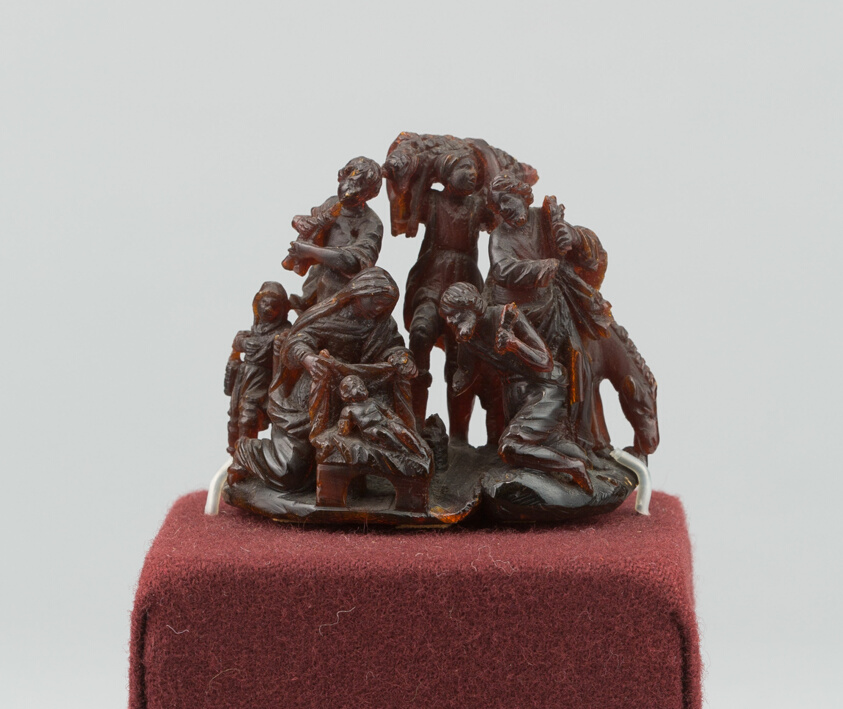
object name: Sculpture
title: Adoration of the Christ Child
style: sixteenth century, 16th Century, 17th Century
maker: German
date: 1550/1600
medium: Amber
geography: Germany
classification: statuette; sculpture; amber; german; religious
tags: holy family, Devotion, Christianity, Christian subjects, religious scenes, religious figures, religious, religion, horse, woman, men, mother and child, families, figures, children, child, babies, fathers, mother, Jesus, Virgin Mary, saints, Virgin and child/Madonna and child, sheep, animals, shepherds